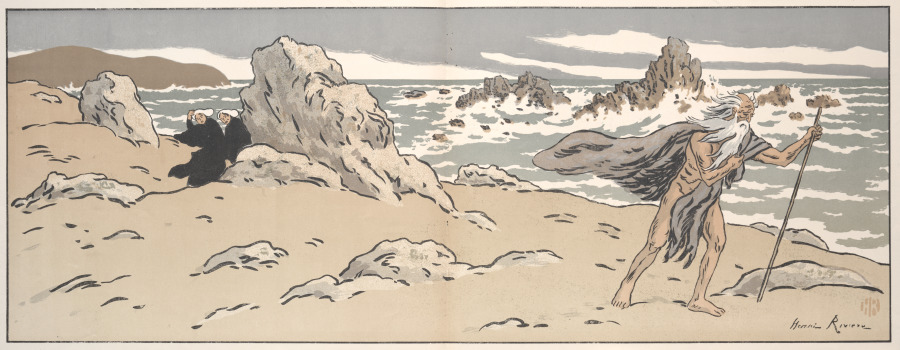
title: The Wandering Jew: Heaven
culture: France, 19th century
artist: Henri Rivière (French, 1864–1951)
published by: Verneau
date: 1896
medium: color lithograph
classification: Portfolio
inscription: title page is signed, in blue crayon: Henri Rivière